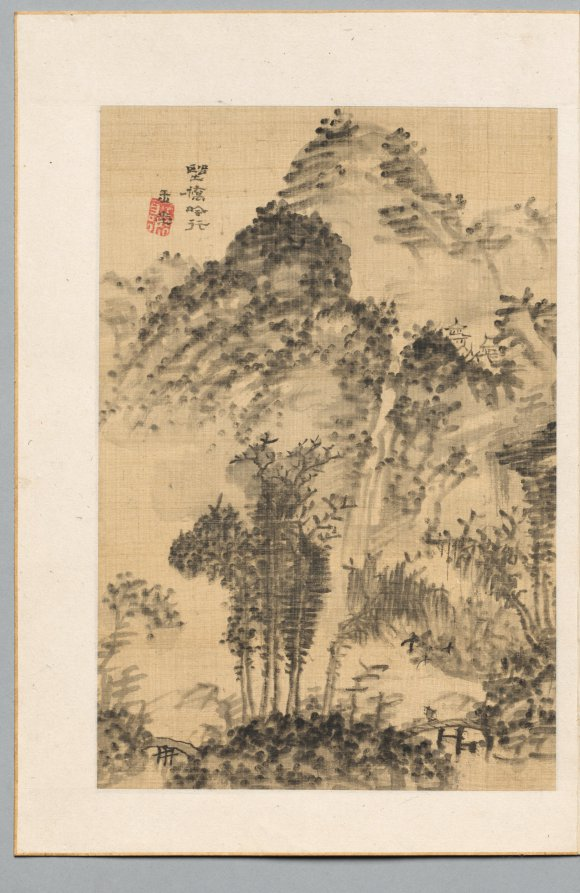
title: Wild Bridge, Poet's Walk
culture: Japan, Edo period (1615–1868)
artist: Uragami Gyokudō (Japanese, 1745–1820)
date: late 1700s-early 1800s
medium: leaf from a pair of folding albums; ink and light color on paper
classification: Portfolio